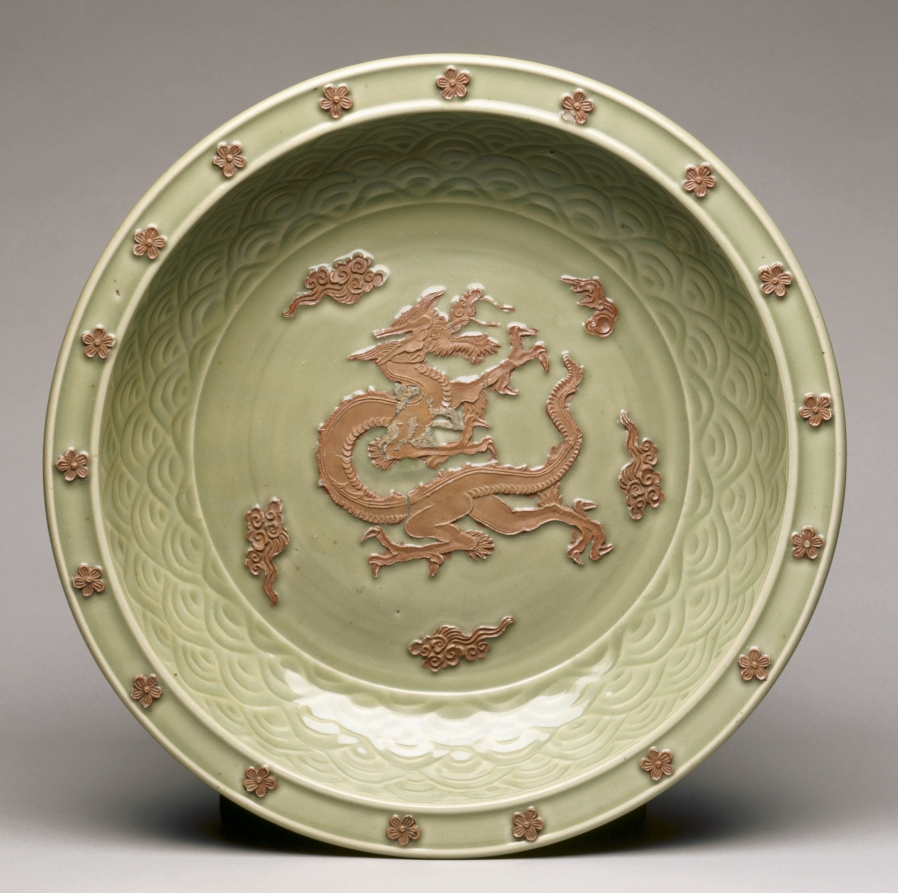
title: Plate with Relief Dragon among Clouds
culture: China, Zhejiang province, Longquan region, Yuan dynasty (1271-1368)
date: 1300s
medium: porcelaneous stoneware with celadon glaze and molded decoration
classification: Ceramic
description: In the center of this plate a majestic coiled dragon is surrounded by clouds, a wave pattern, and five-petaled rosettes around the rim. In front of the dragon's mouth is a flaming pearl, a symbol often associated with dragons from this time. The plate achieves distinctive visual contrasts with green glaze and brown, and its main decorative motifs are raised.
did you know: In front of the dragon's mouth is a flaming pearl, a symbol often associated with dragons from this time.